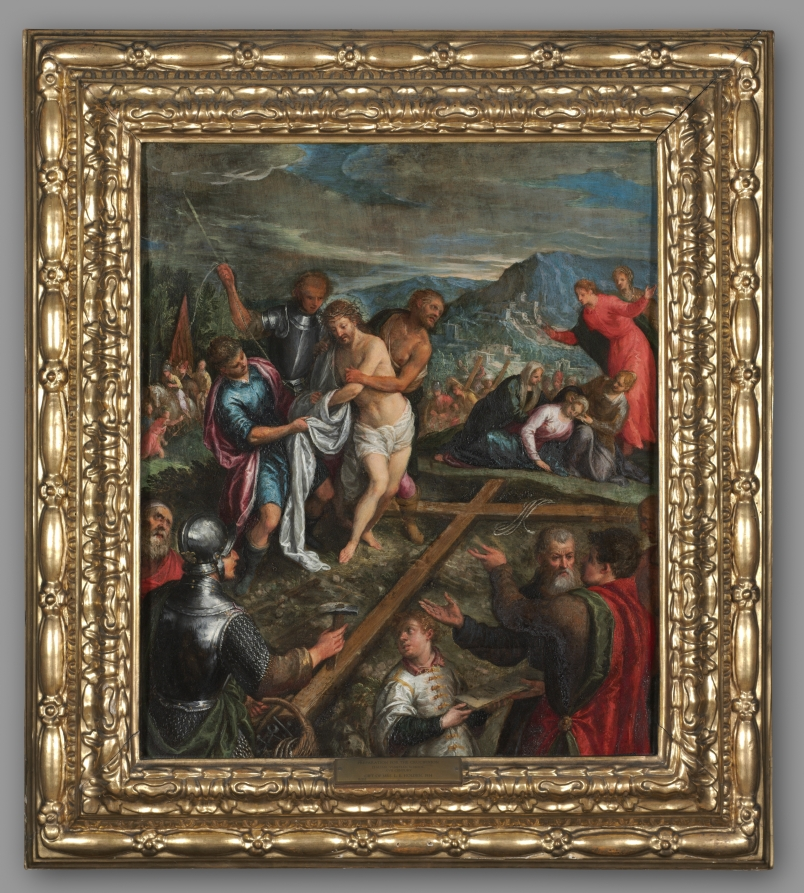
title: Preparation for the Crucifixion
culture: Northern Italy, early 17th century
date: early 1600s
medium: oil on copper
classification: Painting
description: Despite the religious subject, the scale and intricate detail indicate that this painting was not for a church setting. Instead, as an independent work of art, a collector would have admired its artistry and unusual combination of Italian and northern European traditions. Likewise, the subject’s novelty would have intrigued a sophisticated patron. Neither Christ’s disrobing before the Crucifixion nor the debate over the plaque identifying him as Jesus of Nazareth, King of the Jews, are common subjects in the Renaissance. Who made this work remains a mystery. The copper surface, complex composition, and atmospheric landscape imply a painter from north of the Alps, as does Christ’s sinuous body. However, the drapery, rich colors, and figures at lower right stem from Venetian Renaissance art.